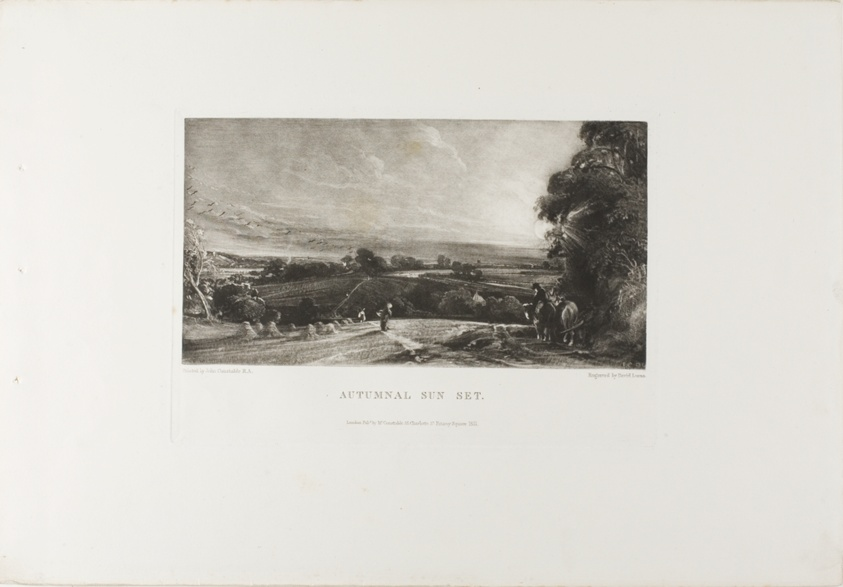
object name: Print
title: Autumnal Sun Set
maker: David Lucas (English, 1802-1881); after John Constable (English, 1776-1837)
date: 1831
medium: Mezzotint in black ink on heavy ivory wove paper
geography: England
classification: mezzotint; print; prints and drawing